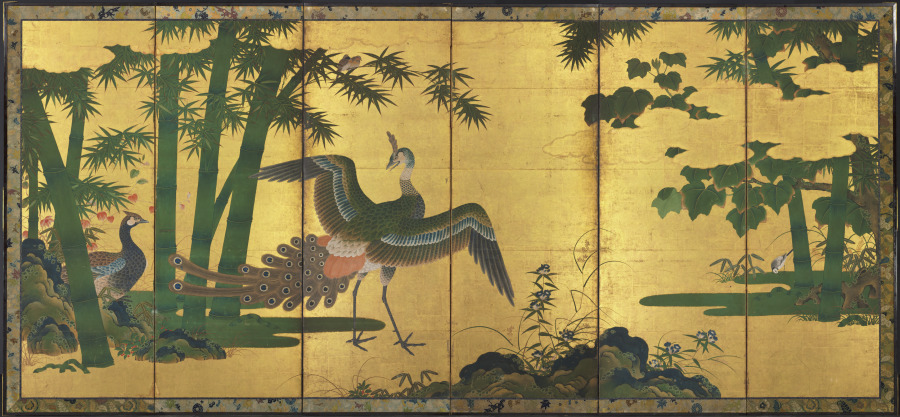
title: Peacocks and Bamboo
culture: Japan, Momoyama period (1573–1615)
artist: attributed to Tosa Mitsuyoshi (Japanese, 1539–1613)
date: late 1500s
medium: One of a pair of six-panel screens; ink, color, and gold on gilded paper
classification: Painting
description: The immense heraldic birds on display in these byøbu reflect the Momoyama era's spirit of newly gained self-confidence and an affinity for grand expressive statements in painting, architecture, the textile and ceramic arts, as well as garden design. While that period preceded the arrival of prosperity, it clearly marked an extra---ordinary moment in Japanese cultural history, one frequently compared with the twelfth century of the Heian period. Through the extensive use of gold-foil backgrounds rather than the somber palette of carefully orchestrated ink tones evident in Muromachi byøbu, patrons colla-borated with artists as well as craftsmen in fostering a decidedly new look in much of Japanese painting. Here for instance there is no imaginary vista suggesting China's vast waterways and mountain ranges. The setting is composed instead of highly stylized lozenges of mineral green paint, suggesting the earth from which clumps of grass, flowering plants, and towering bamboo and paulownia trees emerge. Clusters of lumpy, blue-green rocks dotted with lichen provide stabilizing three-dimensional foils for these islands of vegetation as well as the all-encompassing flat, golden surface. The glorious artificiality of the setting precisely serves the artist's effort to compose a credible yet other-worldly vista for depicting the legendary phoenix gazing across the landscape at the pair of peacocks. Rather than an emblem of immortality, as it is in Western lore, in Japan the phoenix evolved out of its origins in Chinese mythology to become, by the sixteenth century, an auspicious symbol of political authority. Together with clusters of the distinctively shaped paulownia leaves, this long-tailed, mythical bird graced lacquerware as well as mural paintings, proclaiming an air of graceful com-mand. A characteristic infusion of temporality has been included also, through a seasonal flowering schema extending from spring to early summer (right) to fall and the advent of winter (left). Although traditionally attributed to the Tosa school master Tosa Mitsuyoshi (1539-1613), these byøbu possess neither seals nor signatures to confirm that authorship. Known for his jewel-like, modest-sized album paintings of courtly narratives such as The Tale of Genji, it is likely both studio training and contemporary fashions in patronage conspired to produce a good number of such byøbu. This example from the Momoyama era represents one such effort from a masterful Tosa painter, too little seen in Western collections.